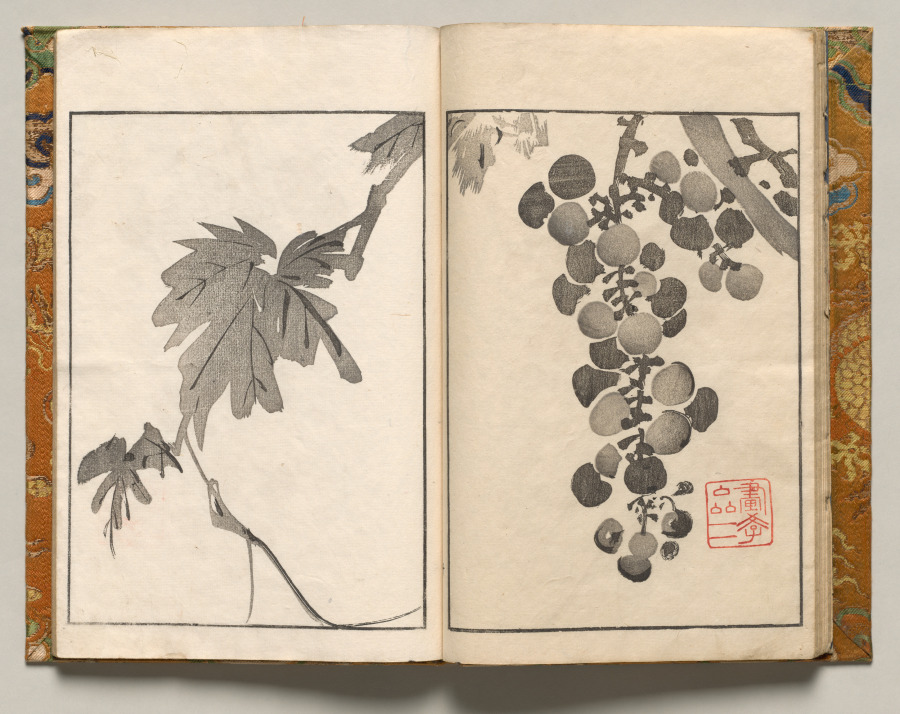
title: Grapevine, Design Ten from Shazanrō Picture Book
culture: Japan, Edo period (1615–1868)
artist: Tani Bunchō (Japanese, 1763–1841)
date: 1816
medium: woodblock-printed book; ink and color on paper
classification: Bound Volume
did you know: Shazanrō was one of Tani Bunchō's style names.